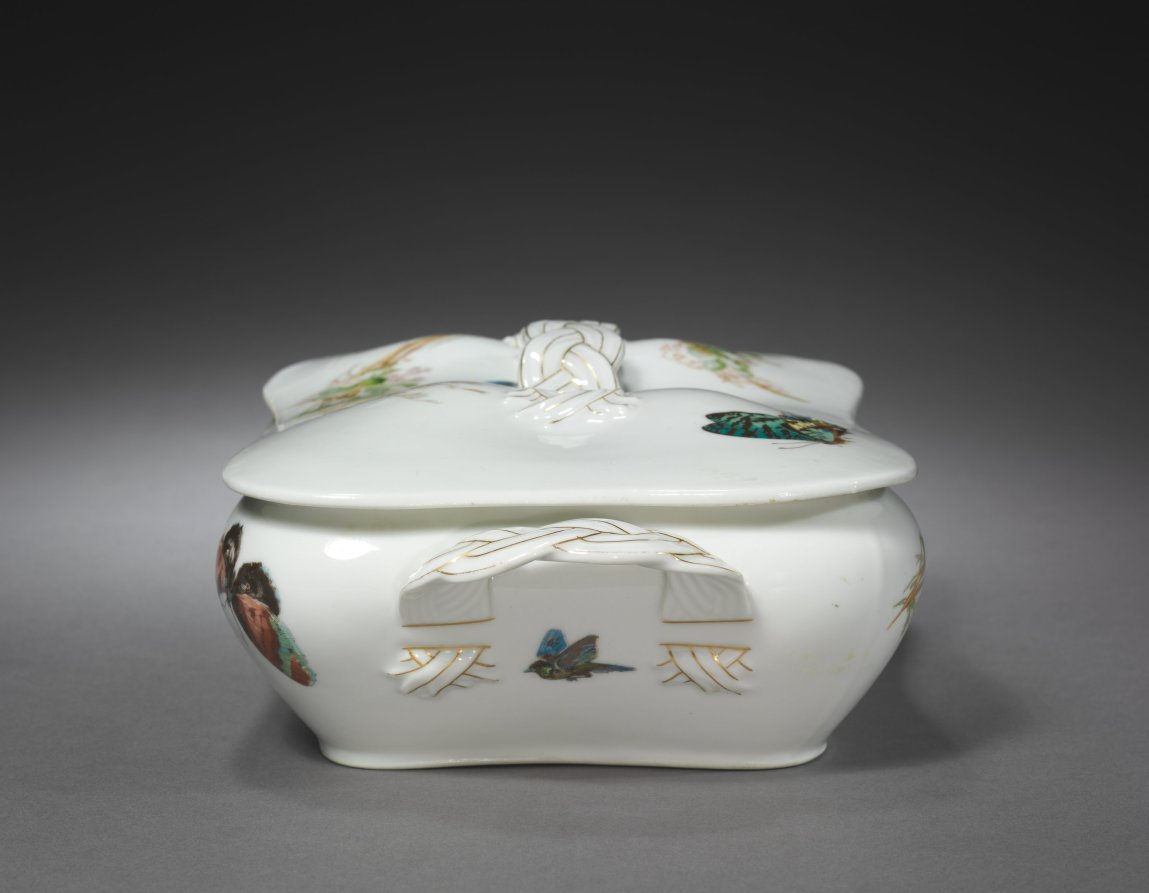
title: Covered Vegetable Bowl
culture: France, Limoges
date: c. 1890–1910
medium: porcelain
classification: Ceramic